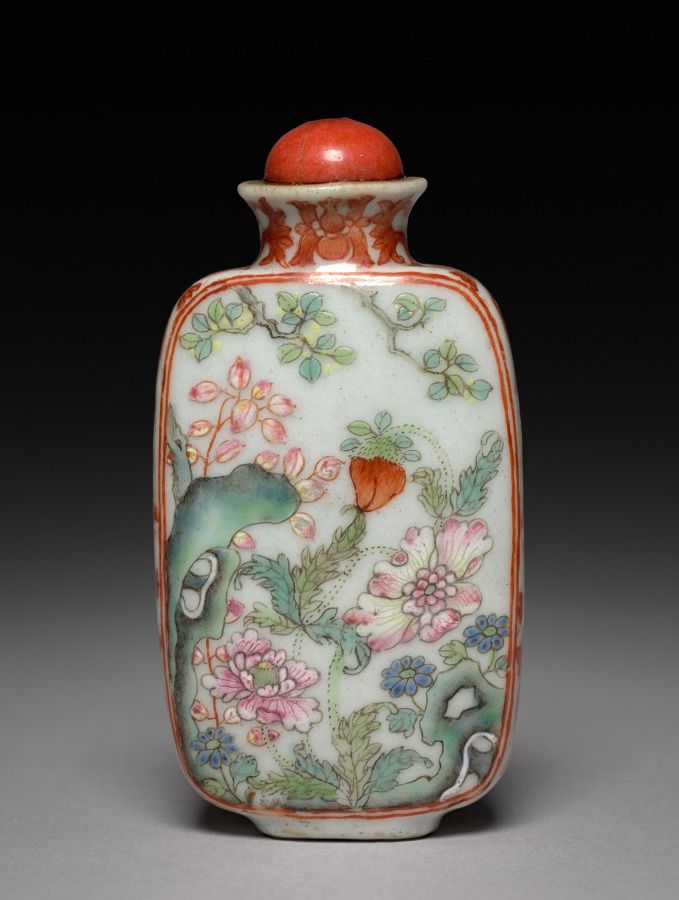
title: Snuff Bottle with Stopper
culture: China, Qing dynasty (1644–1911), Qianlong reign (1736–95)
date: 1736–95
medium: porcelain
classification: Ceramic